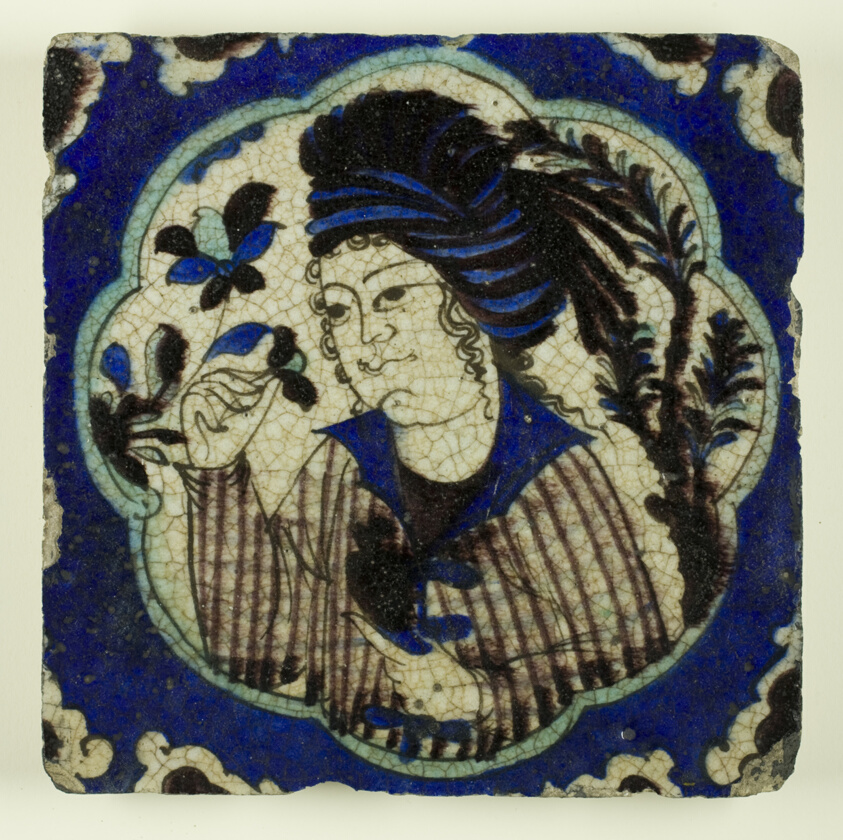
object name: Architectural fragment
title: Tile with a Portrait of a Young Man Inhaling the Perfume of a Flower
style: kubachi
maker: Iran; Northwestern Iran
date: Safavid dynasty (1501–1722), late 16th/early 17th century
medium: Kubachi ware, fritware with blue, black, and turqouise under a tranparent glaze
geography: Iran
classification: earthenware; asian art; ceramics; architectural fragment